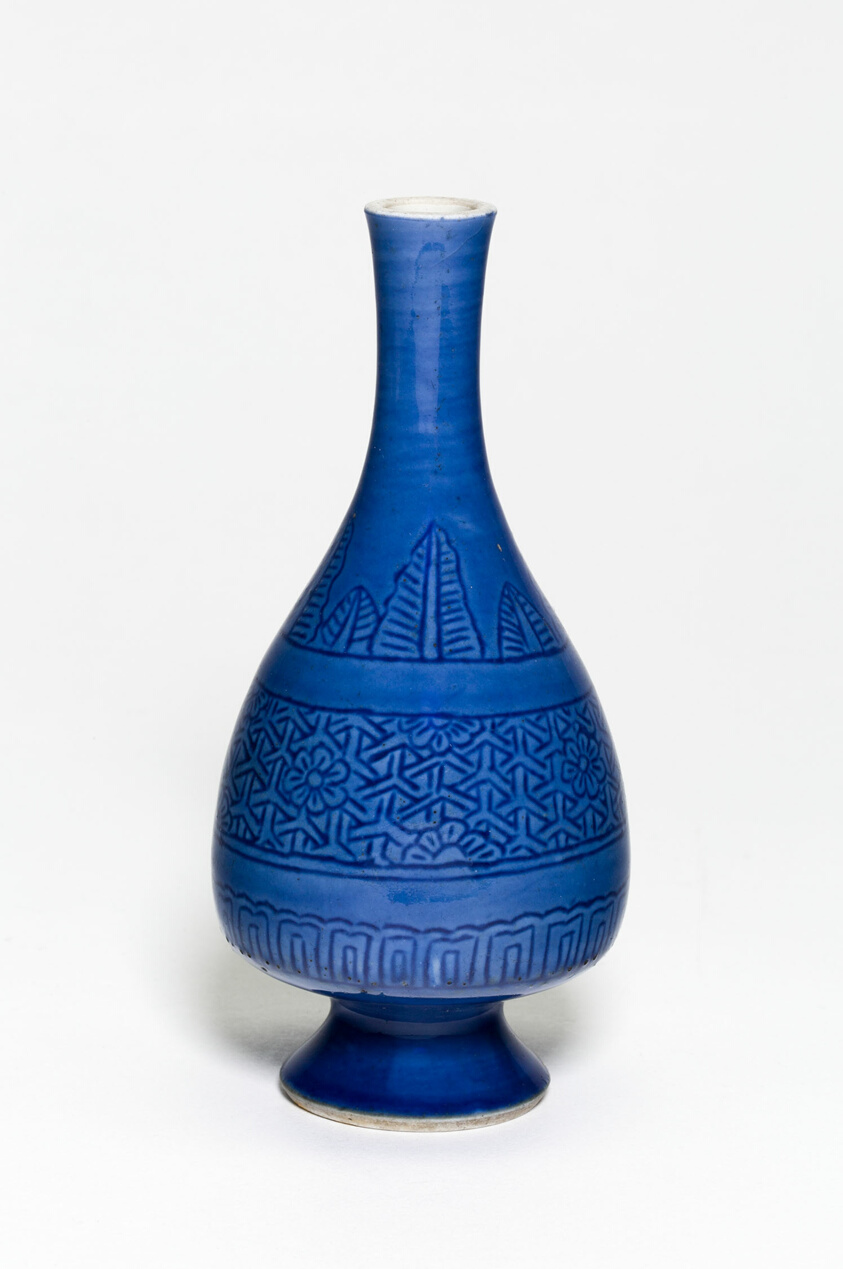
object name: Vessel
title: Pear-Shaped Vase with Plum Flowers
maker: China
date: Qing dynasty (1644–1911), 18th–19th century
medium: Porcelain with powder blue glaze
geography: China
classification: porcelain; asian art; ceramics